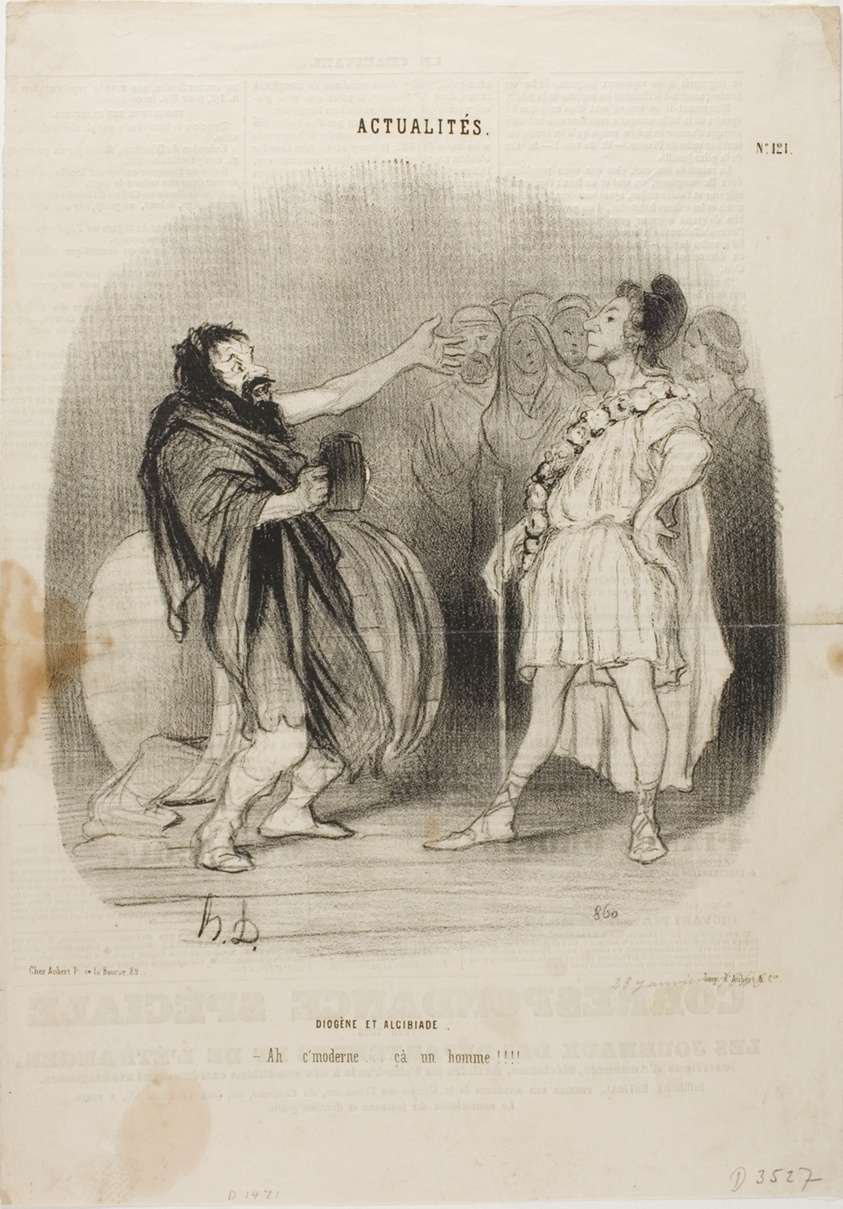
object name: Print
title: Diogenes and Alcibiades at the Odeon. “- Ah... it's modern....what a man!,” plate 121 from Actualités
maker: Honoré Victorin Daumier; French, 1808-1879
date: published January 23, 1846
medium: Lithograph in black, with scraping on stone on cream wove paper, with text added in another hand and letterpress verso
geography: France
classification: lithograph; print; prints and drawing